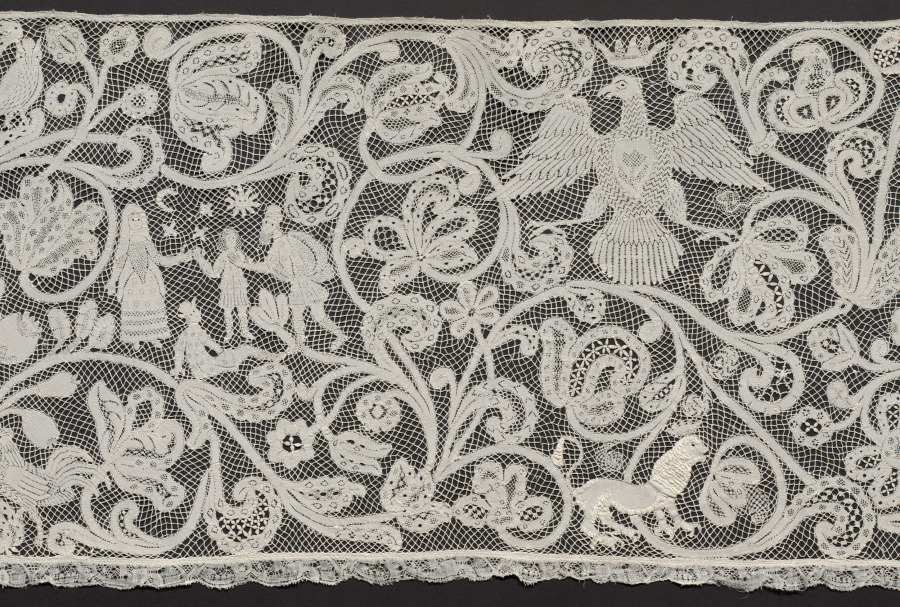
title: Lace Flounce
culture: Italy, Milan(?)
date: 1750–99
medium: Linen: bobbin lace (Punto di Milano)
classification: Lace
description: Being the most prestigious material, lace was used extensively by the 1600s for altar linen and for trimming priest’s albs, often incorporating finely rendered religious images amid blossoming vines. This alb flounce depicts scenes from the Old Testament story of Joseph, whose jealous brothers sold him to a caravan bound for Egypt. Joseph later interpreted dreams of the pharaoh, who made him ruler. When famine in Canaan caused Joseph’s ten brothers to travel to Egypt in search of food, they bowed down to him. After he revealed his identity, he forgave his brothers and God saved the family.